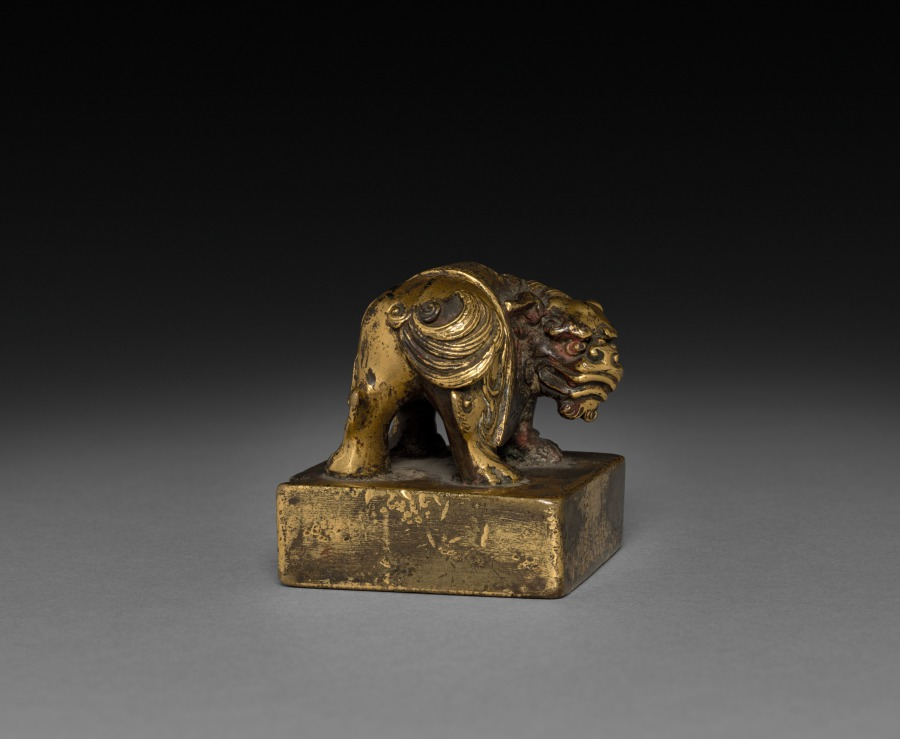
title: Seal, Lion-Dog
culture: China, Song dynasty (960-1279)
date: 960– 1279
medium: gilt bronze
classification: Metalwork